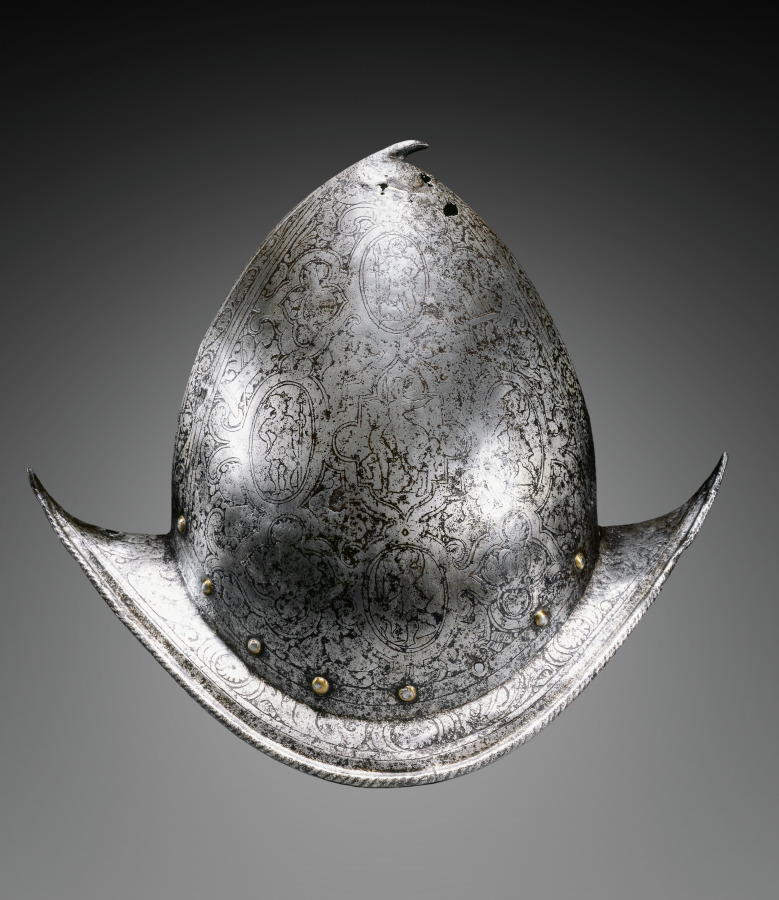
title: Pear Stalk Cabasset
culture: North Italy, Brescia(?), late 16th Century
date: 1580–1600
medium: steel, etched, roped edge and brass rivets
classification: Arms and Armor